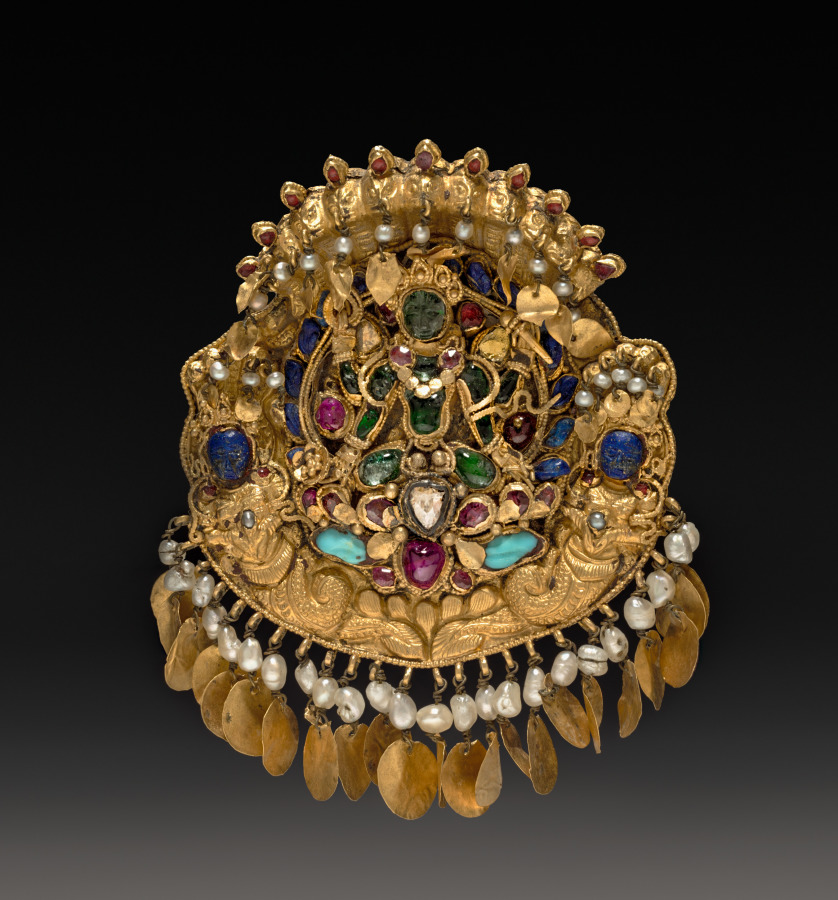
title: Pendant with Four-armed Green Vishnu on a lotus with Nagas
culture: Nepal, Kathmandu Valley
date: 1600s or 1700s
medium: Gold set with precious and semiprecious stones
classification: Jewelry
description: Vishnu, made of emeralds, holds his typical emblems, each made of gold: a discus in his upper right hand, the club in his upper left, and a lotus in his lower right hand. He sits cross-legged on a lotus pedestal made of spinels, nestled on the back of his mount, Garuda, shown with a crystal face, spinel torso, and turquoise wings. The intertwined bodies of nagas (serpent deities) form the bottom of this pendant; each naga holds a pearl in offering; their faces are carved from lapis lazuli. An eleven-headed serpent hood rears over the entire ensemble.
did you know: In Nepal and South India, the Hindu god Vishnu can be shown as either blue or green.